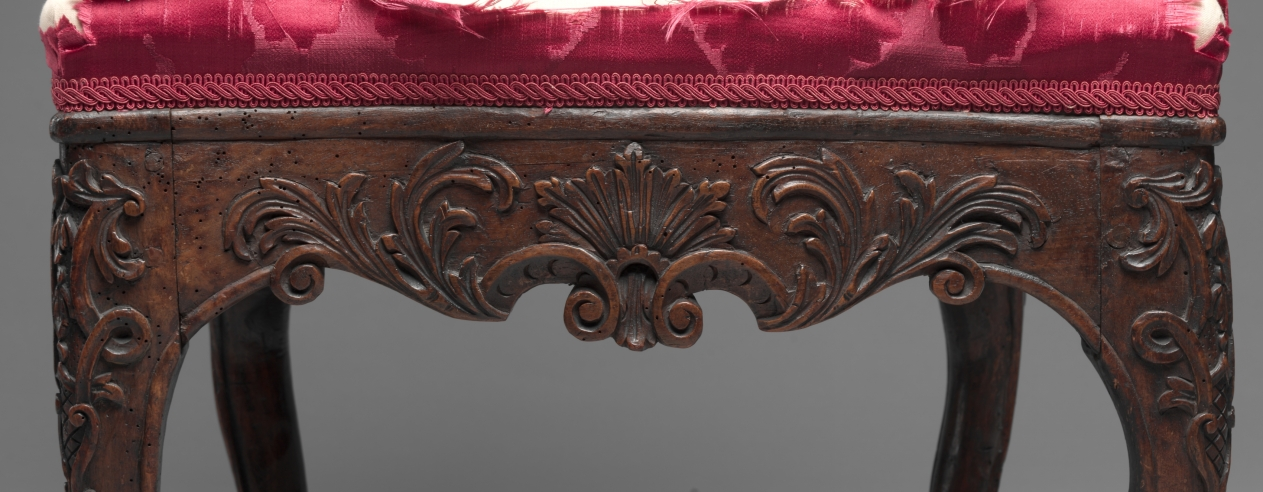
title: Side Chair (1 of 2)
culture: Germany, Belgium, or the Netherlands, early 18th century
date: early 1700s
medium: walnut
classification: Furniture and woodwork